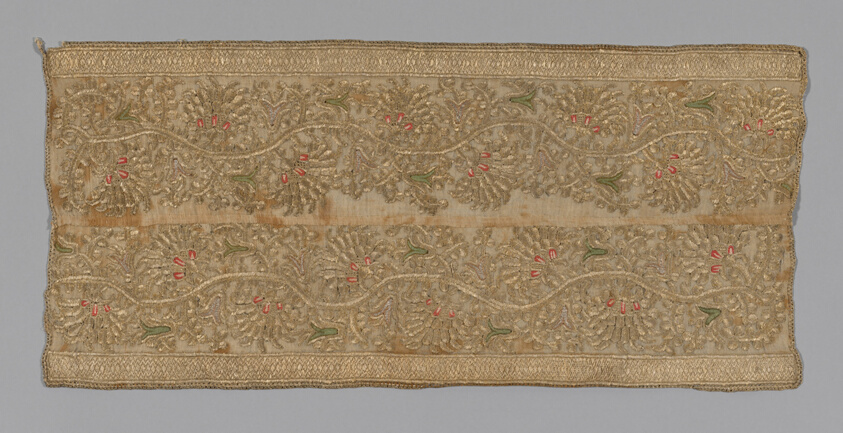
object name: Textile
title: Fragment (Towel or Napkin)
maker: Turkey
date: 1875/1900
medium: Towel ends, embroidered in gold in design of running floral spray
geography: Turkey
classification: textile; needlework (visual works); weaving